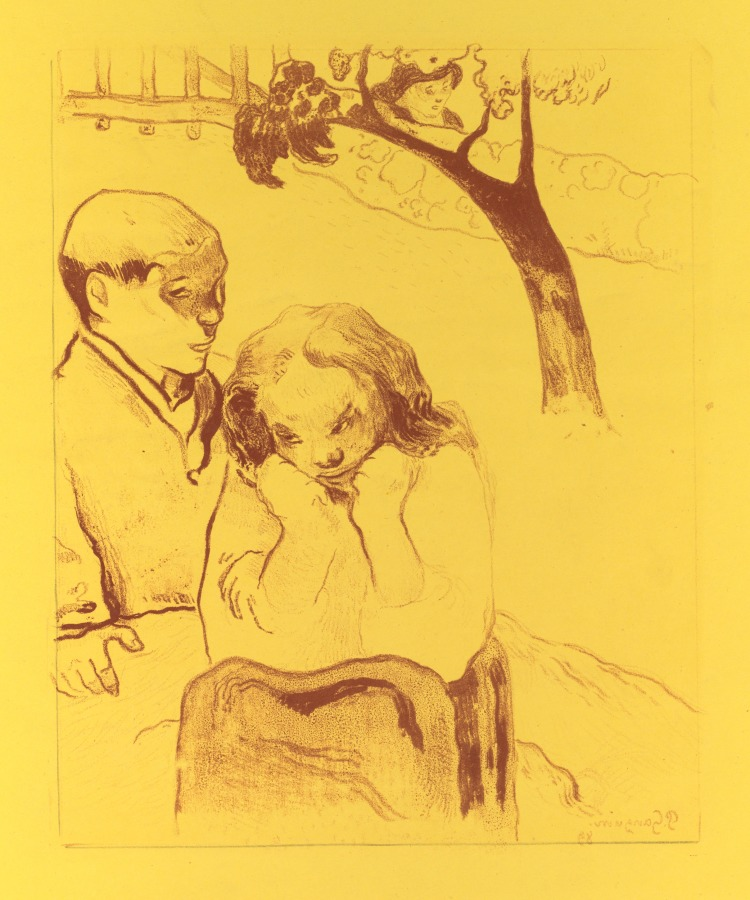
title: Volpini Suite: Human Misery (Misères Humaines)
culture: France, 19th century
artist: Paul Gauguin (French, 1848–1903)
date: 1889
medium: zincograph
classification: Print